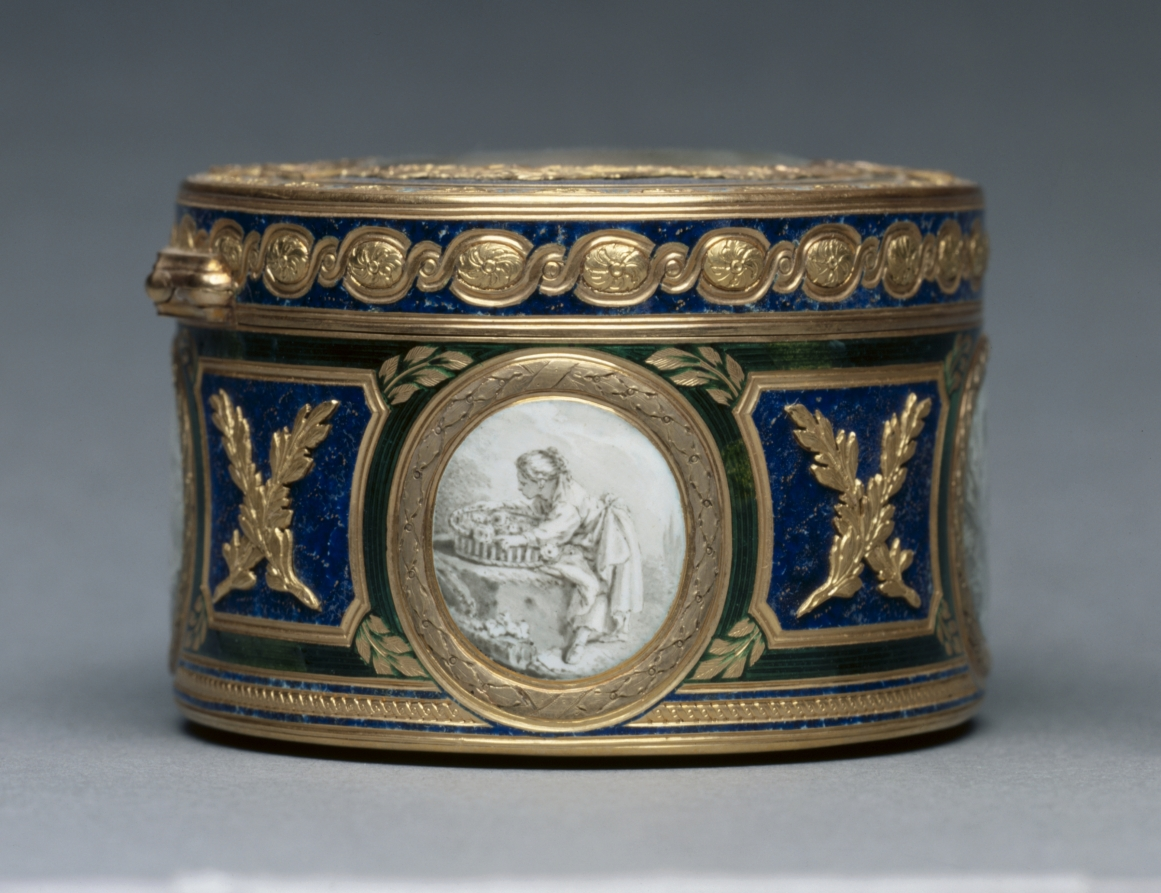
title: Snuff Box (Tabatière) with Portrait of Marie Antoinette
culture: France, 18th century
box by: Pierre-François-Mathis de Beaulieu (French)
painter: François Dumont (French, 1751–1831)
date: 1768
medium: watercolor on ivory in a gold and enamel box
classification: Enamel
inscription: [Maker's mark of Pierre-François-Mathis de Beaulieu, master goldsmith in 1768, inside cover]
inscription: [Charge mark of Jean-Jacques Prévot, 1762-1768, inside cover]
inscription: [Warden's mark of Paris, 1768-1769, inside cover]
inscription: [Discharge mark of Julien Alaterre, Paris, 1768-1774, on neck at right]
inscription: [Inside box, the letter]: "F"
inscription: [On bezel at left, engraved number]: "627"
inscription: [On front of bezel, engraved signature]: "Ve Georges Beaulieu à Paris"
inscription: [On right of miniature portrait, the letter]: "D"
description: This box was created through the collaboration of two skilled and well-known artisans of the period, master goldsmith Pierre-François-Mathis de Beaulieu and celebrated miniature painter François Dumont. The portrait of Marie Antoinette on the box's lid is painted in Dumont’s own style while those on the sides and bottom of the box take inspiration from the work of painter François Boucher, known for his pastoral scenes in the Rococo style.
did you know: Marie Antoinette, queen consort of French King Louis XVI and great patron of the decorative arts, was executed in 1793 at the end of the French Revolution.